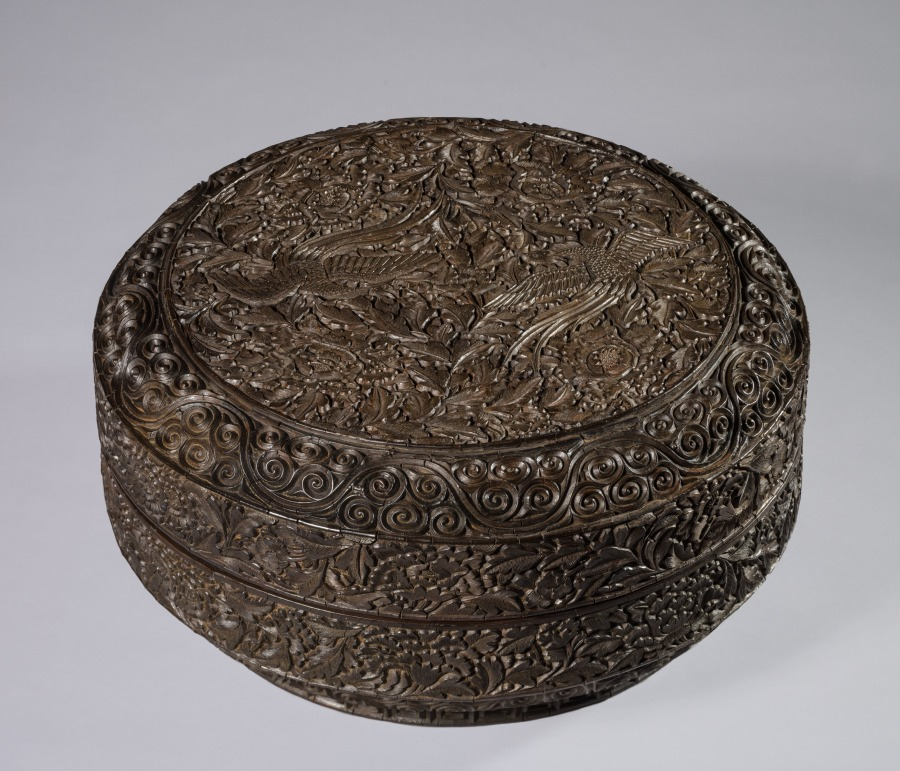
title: Round Box with Bird and Peonies Design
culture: China, late Southern Song (1127–1279) to early Yuan dynasty (1271–1368)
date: c. 1300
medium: carved lacquer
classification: Lacquer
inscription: 山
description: The carved lacquer box and lobed silver container nearby both feature pairs of birds and flowers on their covers. There is a striking similarity in decoration, shape, and aesthetic appeal. Both boxes suggest that successful designs and shapes circulated among craftsmen, workshops, and beyond regional borders.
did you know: Lacquer ware was always a valuable product in Chinese material culture and was often used as precious gifts in diplomatic, religious, and economic exchanges with other countries—Japan, for example, where this box was long preserved and acquired.